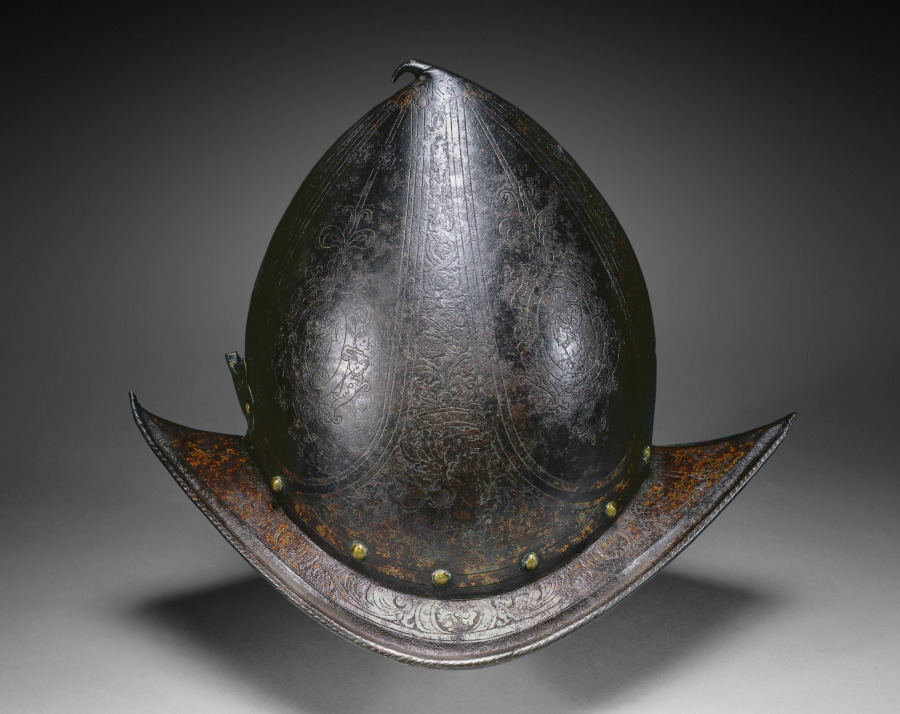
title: Peaked Morion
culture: North Italy, Milan?, 16th century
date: c. 1580–90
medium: etched russet steel with traces of gilding; roped brim, brass plume holder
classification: Arms and Armor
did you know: Originally this helmet was topped with a feathered plume. The Swiss Guard, a regiment of soldiers that has guarded the Vatican since the 16th century, wear similar looking peaked morions today, though theirs are adorned with voluminous ostrich feather plumes.